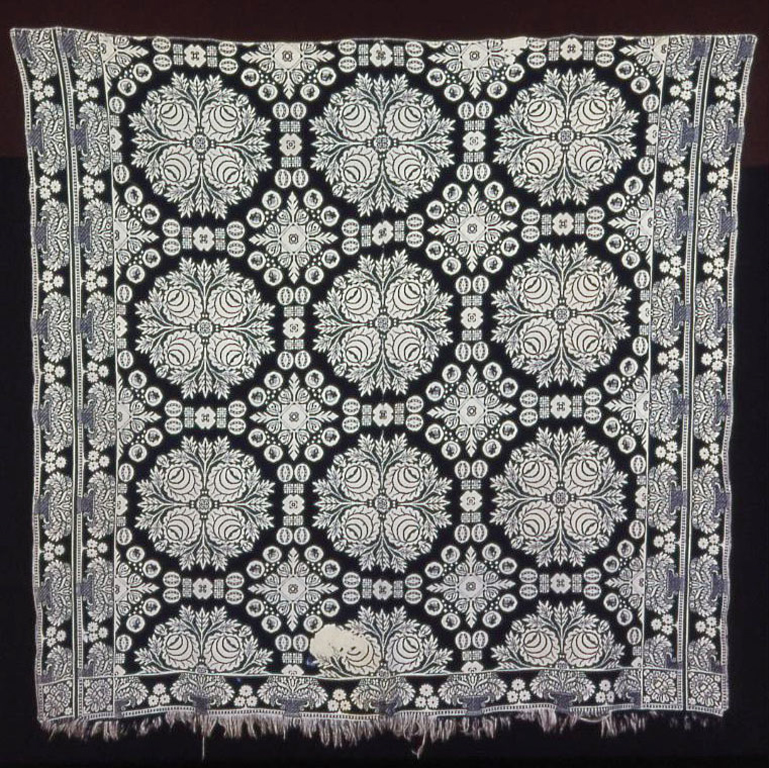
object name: Textile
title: Coverlet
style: 19th century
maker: United States, New York or Ohio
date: 19th century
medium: Cotton and wool, plain weave double cloth; woven on loom with Jacquard attachment; two loom widths joined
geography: New York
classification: weaving - coverlet; coverlet; weaving; textile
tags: floral motifs, medallions, faces, urns, roses, flowers, foliage, circles, border section, coverlet